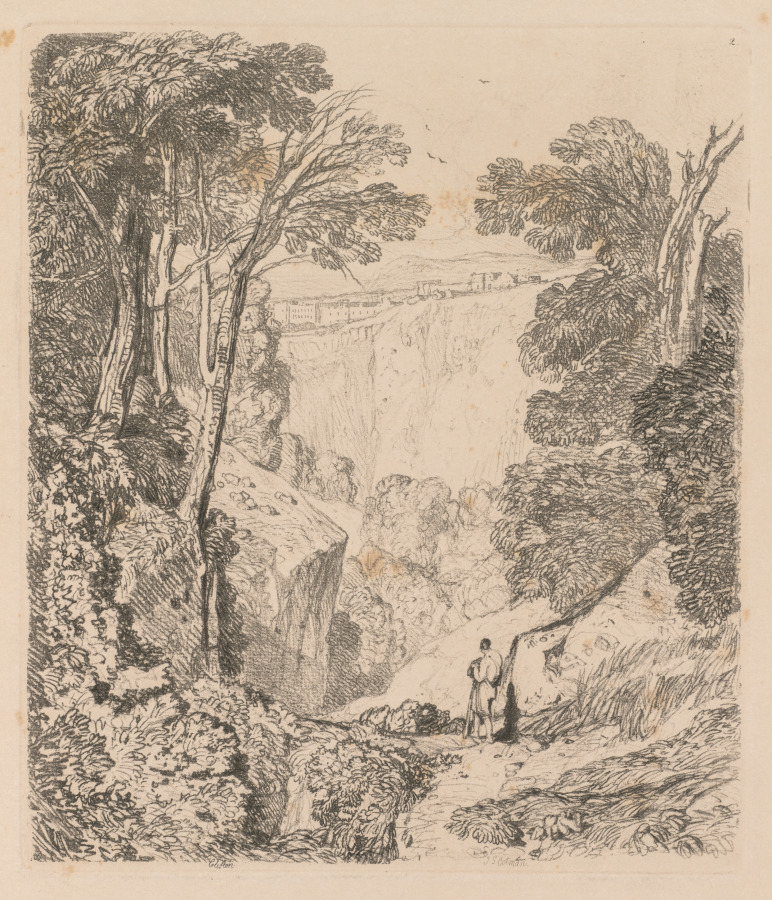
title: Liber Studiorum: Plate 2, View of Clifton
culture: England, 19th century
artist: John Sell Cotman (British, 1782–1842)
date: 1838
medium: softground etching, from a bound volume containing 48 plates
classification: Bound Volume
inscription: In plate, within image: upper right: 2; in plate, below image: Clifton J.S. Cotman